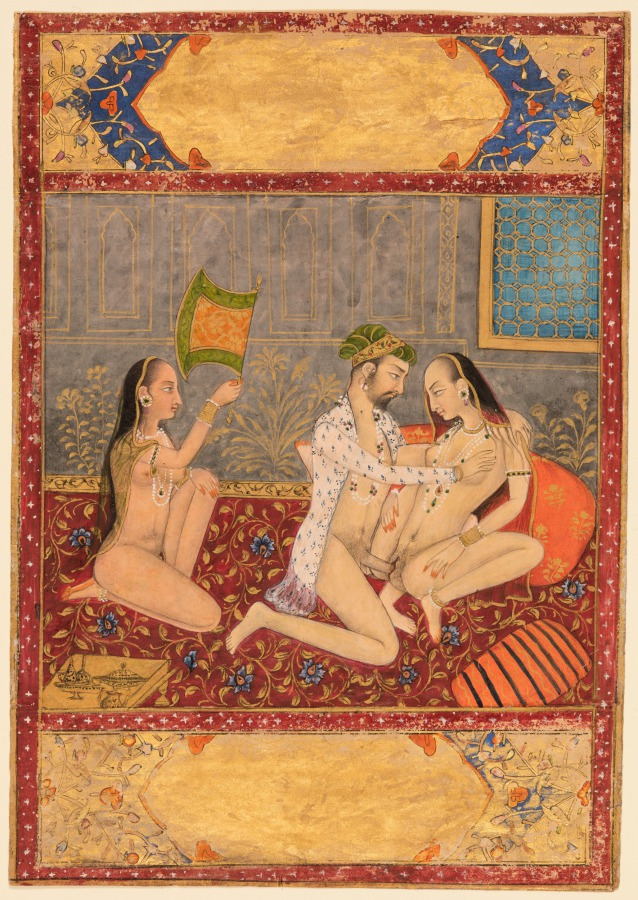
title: A King Making Love in the Harem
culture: Northwestern India, Rajasthan, Rajput Kingdom of Jaipur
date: c. 1720–30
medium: gum tempera and gold on paper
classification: Painting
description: From a series of paintings valorizing the virility of the ruler, this scene of lovemaking is set in the lavish interior space of the palace women’s quarters. Mauve floral carpet, gold lattice window, and vessels for wine and breath-freshening paan enhance the scene. The marble walls with gold flowering plants and niches appear gray in the dim evening light.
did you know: Two illuminated panels at top and bottom are decorated with gold and lapis lazuli.